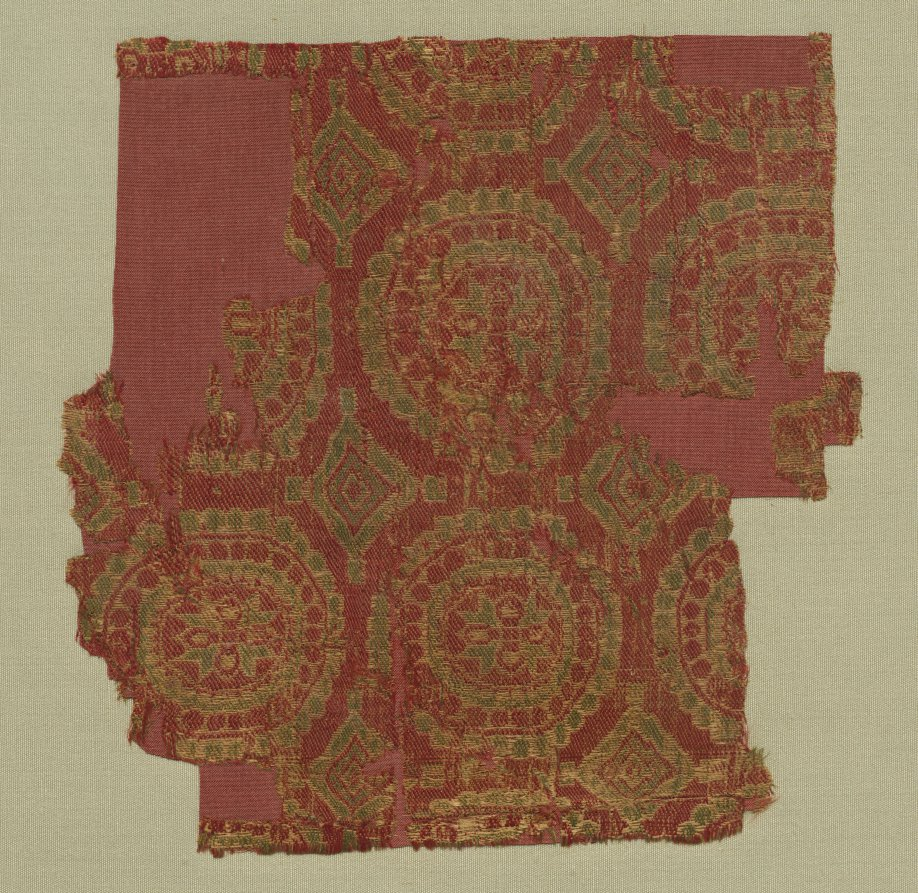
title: Samite with roundels of rosettes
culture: Iran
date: 700s-800s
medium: samite: silk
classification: Textile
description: This is one of a large number of silks woven with geometric designs that have traditionally been attributed to Sogdiana. However, the untwisted warps and light weight of the silk indicate that it was woven farther east in Central Asia where Sogdian influence was strong. Similar geometric patterns occur on clothing depicted in paintings found in the Khotan oasis. That region maintained close cultural and economic ties with Sogdiana. Whether this silk was woven in the Khotan oasis or elsewhere in Central Asia is not known.